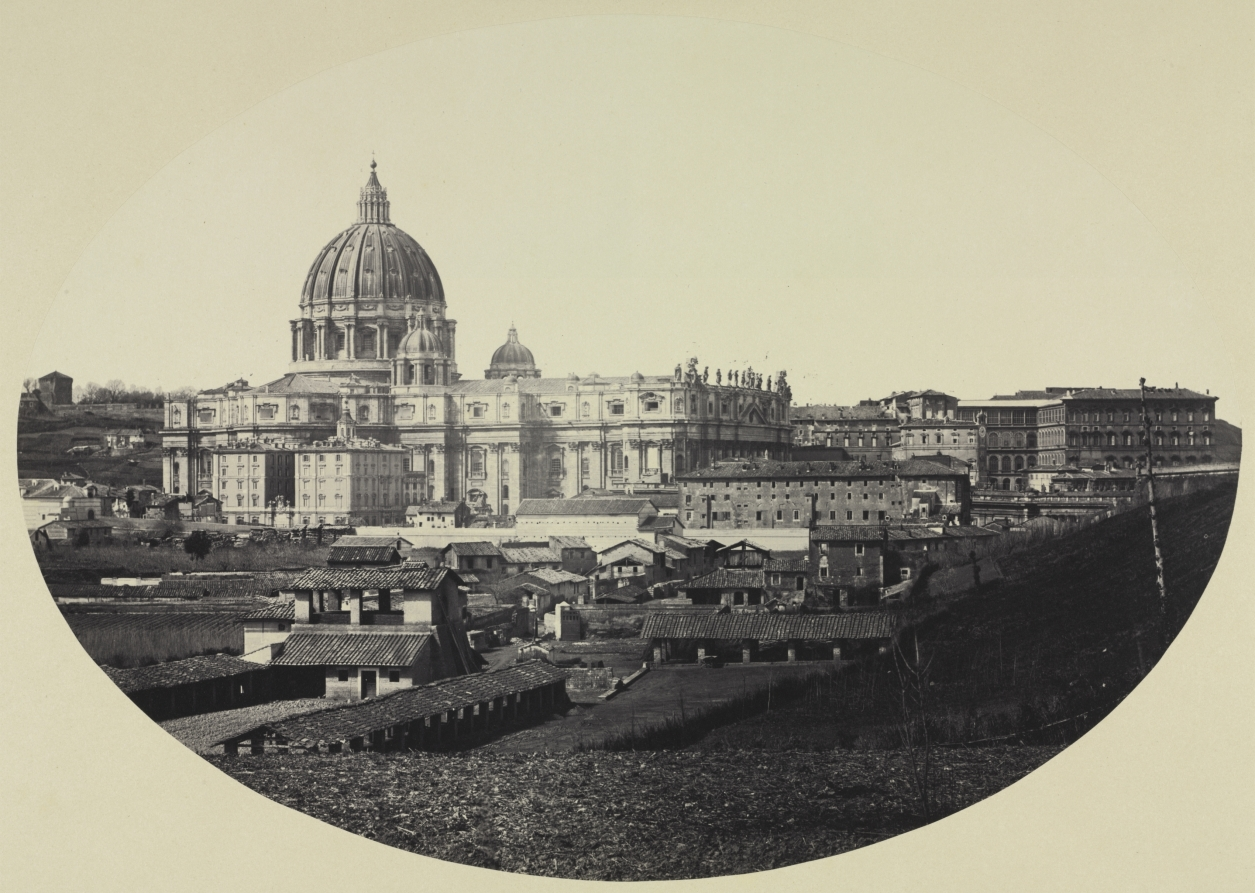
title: St. Peter's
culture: England, 19th century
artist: Robert Macpherson (British, 1811–1872)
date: 1858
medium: albumen print from wet collodion negative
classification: Photograph